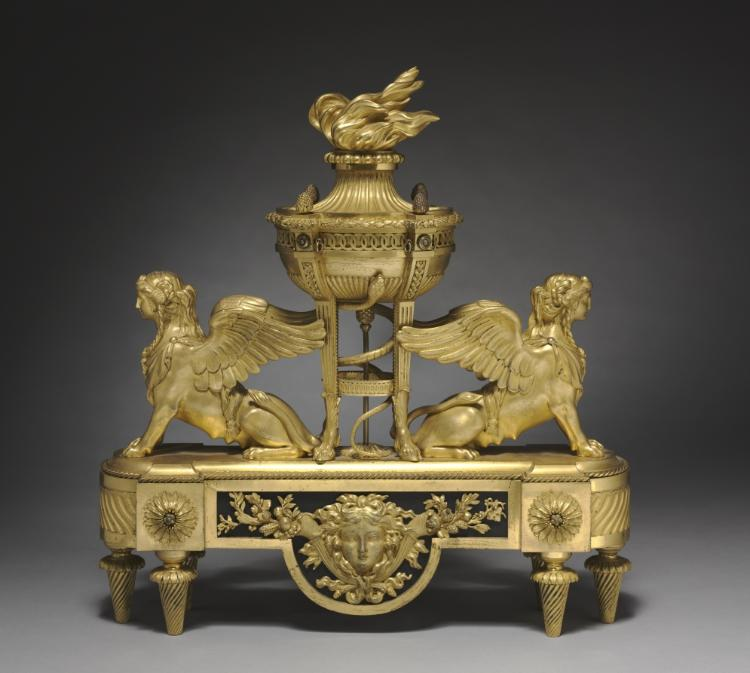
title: Firedog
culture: France, 18th century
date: c. 1785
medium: gilt bronze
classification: Furniture and woodwork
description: Although Louis Jean Desprez’s design was largely inspired by tombs in southern Italy, he added sphinxes in his print Tomb with Sphinx due to his fascination with ancient Egypt. Ancient Egyptians saw the sphinx, a half-human, half-lion mythological creature, as a protector of tombs and temples. The pair of andirons, decorative supports for a hearth’s firewood, alongside Tomb with Sphinx, highlight the growing interest in Egyptomania during the 1700s. Interestingly, the andirons portray ancient Greek and Roman interpretations of the sphinx. Most Europeans learned of ancient Egypt by studying Egyptomania in ancient Roman and Greek art and architecture or Egyptian antiquities brought over by the Romans.